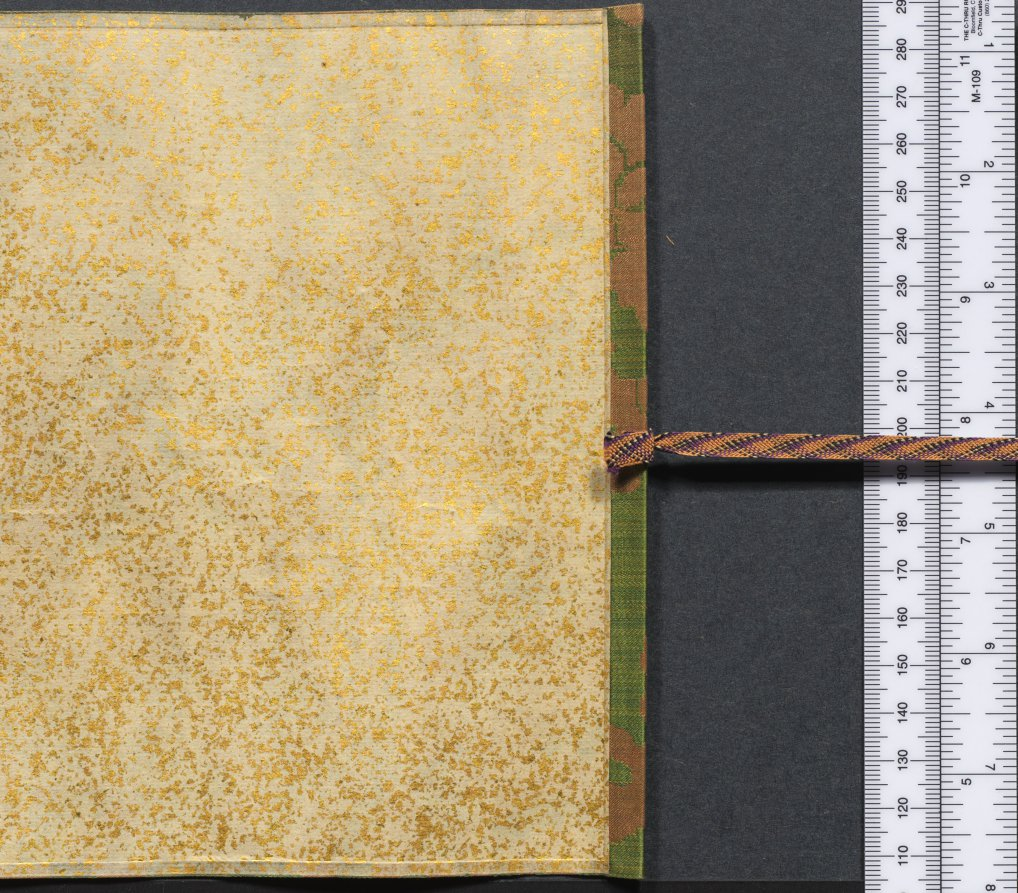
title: The Saltmaker's Story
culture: Japan, Edo period (1615–1868)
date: early 1600s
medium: One of a pair of handscrolls; ink, color, and gold on paper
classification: Painting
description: Once read and copied by girls at New Year’s celebrations and included in dowries, The Saltmaker’s Story is a rags-to-riches tale in which daughters are gifts from the gods. Despite his simple outlook, the main character progresses from humble roots as an associate at Kashima Shrine to the elite status of grandfather of the emperor through the intervention of the Kashima deity. The Saltmaker’s Story is traditionally presented in a set of three scrolls, but the text of this set has been removed by a previous owner, who remounted the illustrations as a pair. The paintings of this one take us from right to left through the first half of the tale.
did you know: This handscroll originally had texts before its paintings, but the texts were removed.